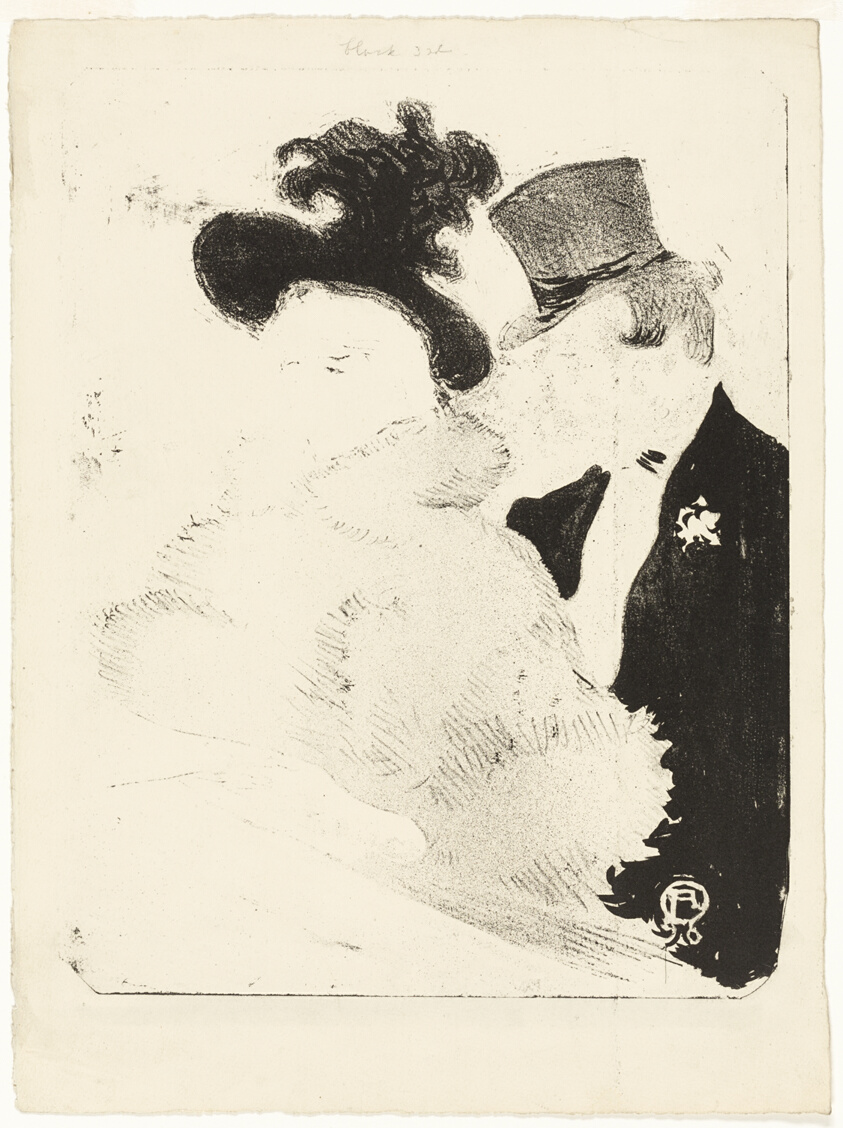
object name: Print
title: At the Concert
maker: Henri de Toulouse-Lautrec (French, 1864-1901)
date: 1896, printed 1946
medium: Zincograph on grayish-ivory laid chine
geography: France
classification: zincograph; print; prints and drawing